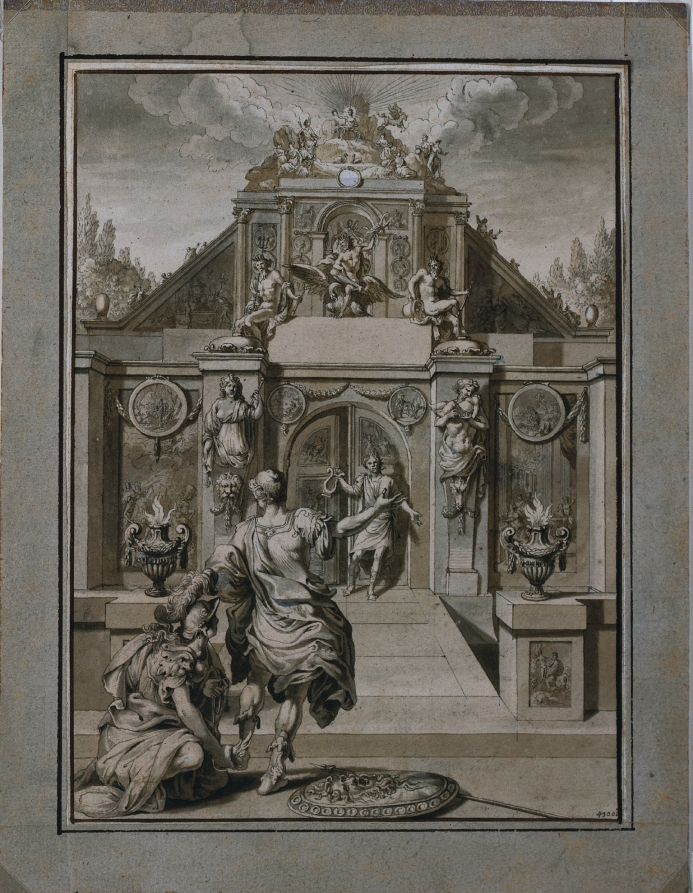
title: Perseus and Minerva before a Temple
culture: Netherlands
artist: Jan Goeree (Dutch, 1670–1731)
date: early 1700s?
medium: pen and brown ink, brush and brown and gray wash, over traces of red chalk, heightened with white gouache; framing lines in brown ink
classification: Drawing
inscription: in gray ink, lower right: 4300 ; VERSO OF SECONDARY SUPPORT, lower right, in brown ink: Van Orlaÿ ; center, in graphite: C. [de?] R.